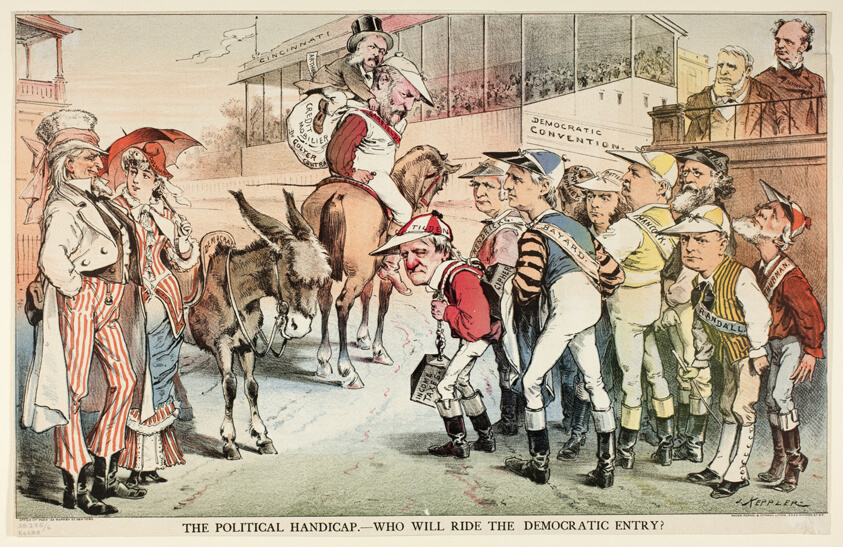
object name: Print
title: The Political Handicap, from Puck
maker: Joseph Keppler (American, 1838-1894)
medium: Color lithograph on newsprint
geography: United States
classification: lithograph; print; prints and drawing